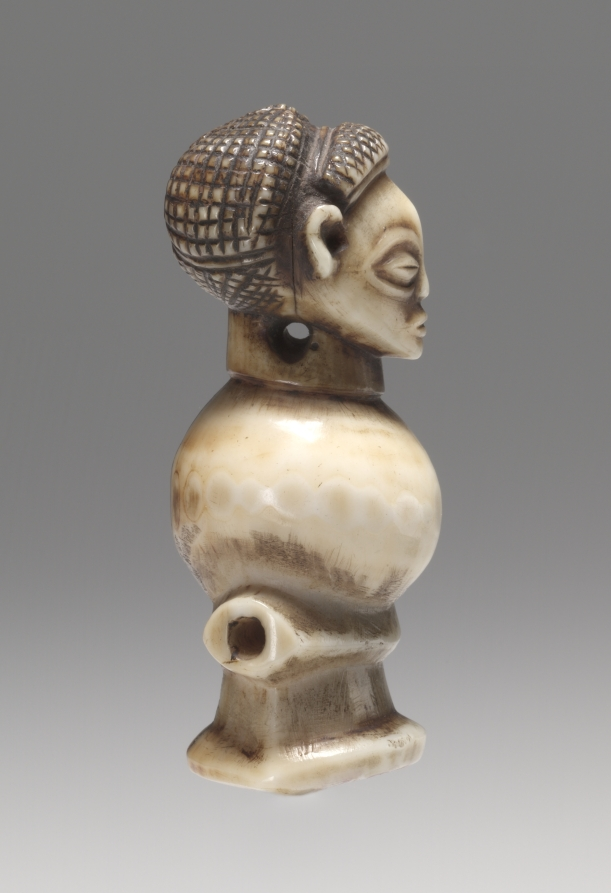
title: Whistle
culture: Central Africa, Democratic Republic of Congo or Angola, Chokwe people, late 1800s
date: late 1800s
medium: Probably hippopotamus ivory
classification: Musical Instrument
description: This was the first sculptural work from Africa to enter the CMA's collection.